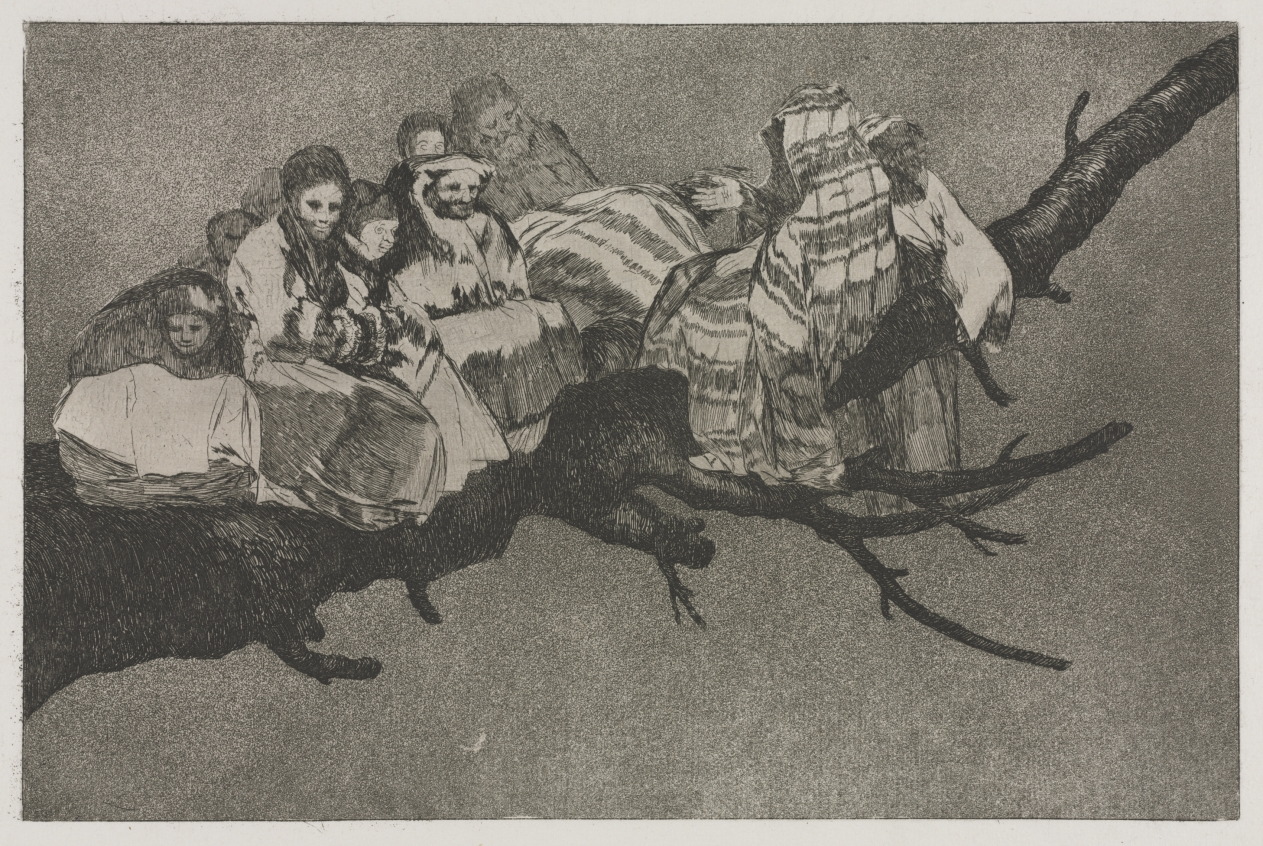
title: The Proverbs: Ridiculous Folly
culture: Spain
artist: Francisco de Goya (Spanish, 1746–1828)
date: 1864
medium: etching and aquatint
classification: Print